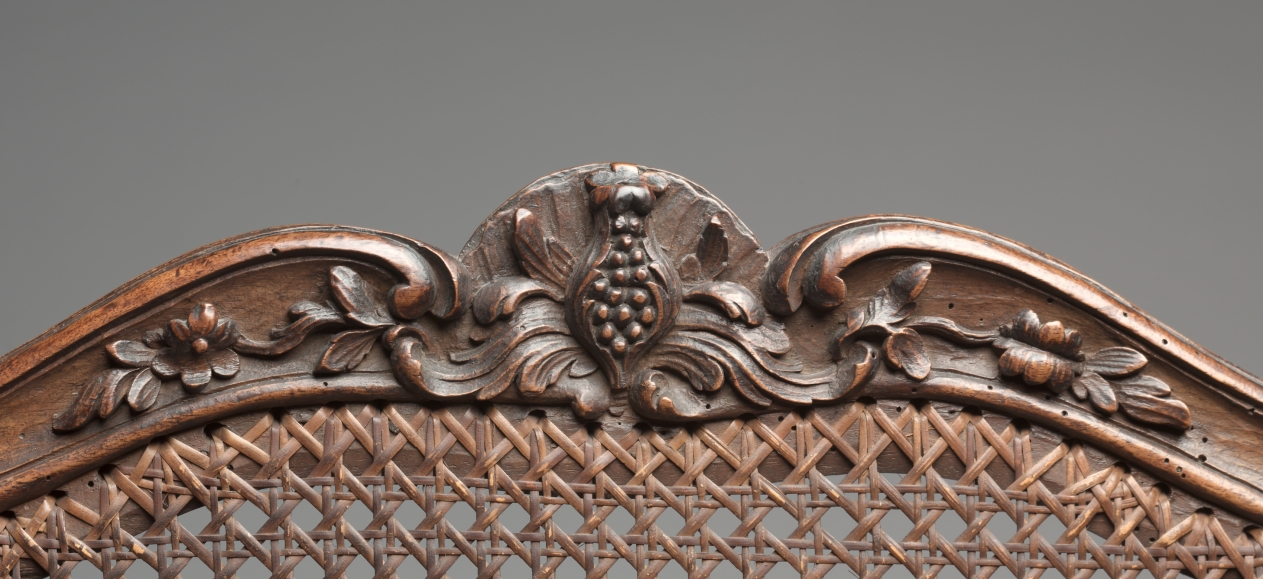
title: Armchair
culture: France, 18th century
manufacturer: René Cresson (French, c. 1705–c. 1749)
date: c.1740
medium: carved wood, cane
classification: Furniture and woodwork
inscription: signed underneath on strip across back: "CRESSON LAINE" (the trademark for René Cresson).